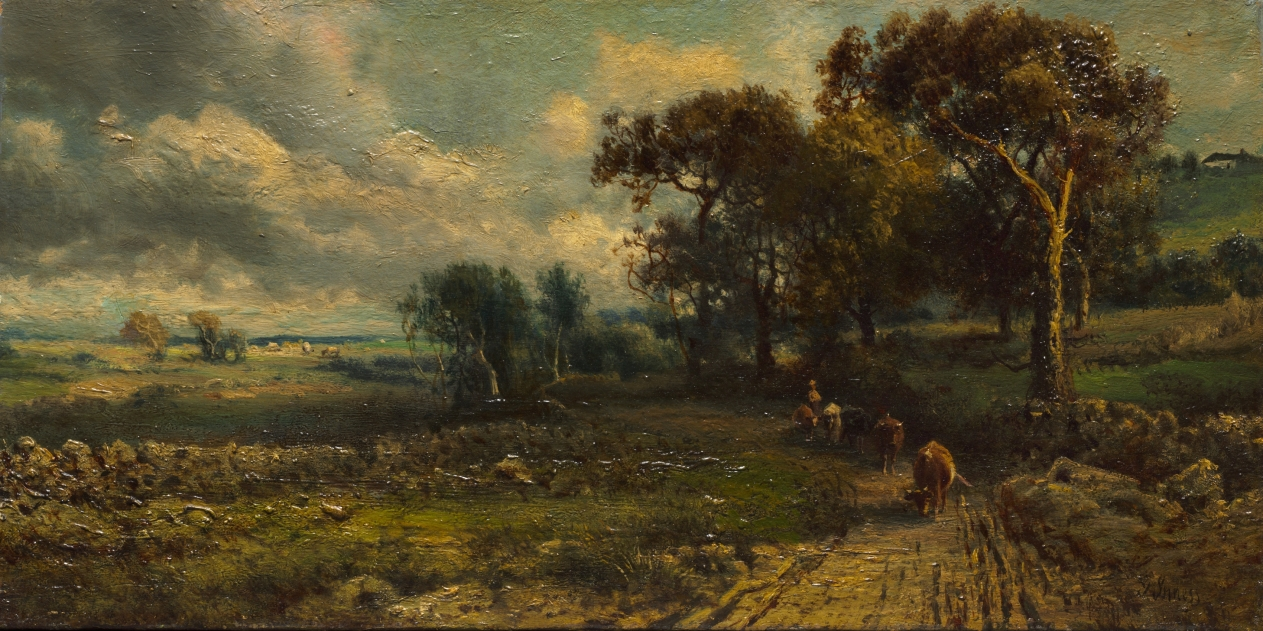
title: Fleecy Clouds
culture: America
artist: imitator of George Inness (American, 1825–1894)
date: 1881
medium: oil on canvas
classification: Painting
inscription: Signed lower right: "G. Inness / 81"